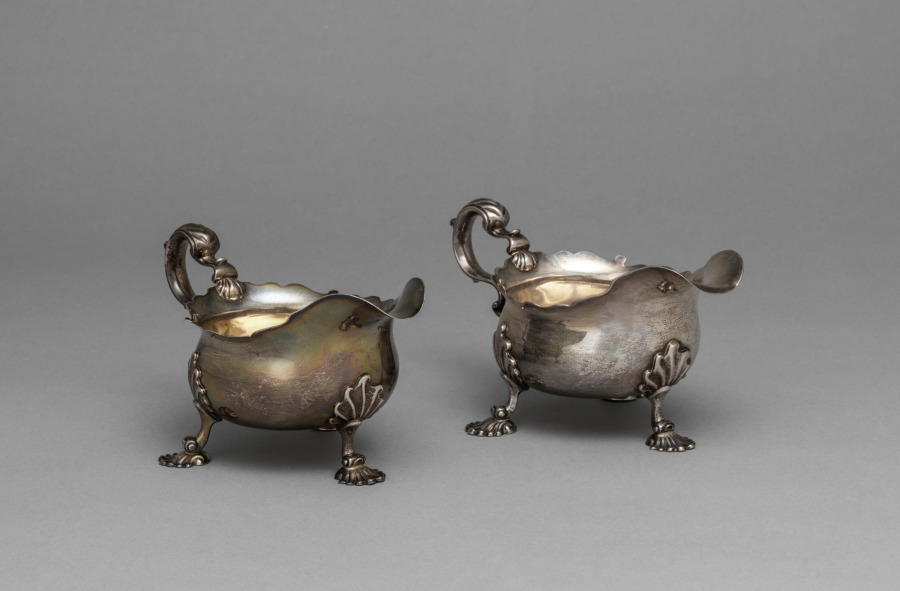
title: Pair of Gravy Boats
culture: England, 18th century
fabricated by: Samuel Wood (British)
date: 1746–1747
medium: silver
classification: Silver